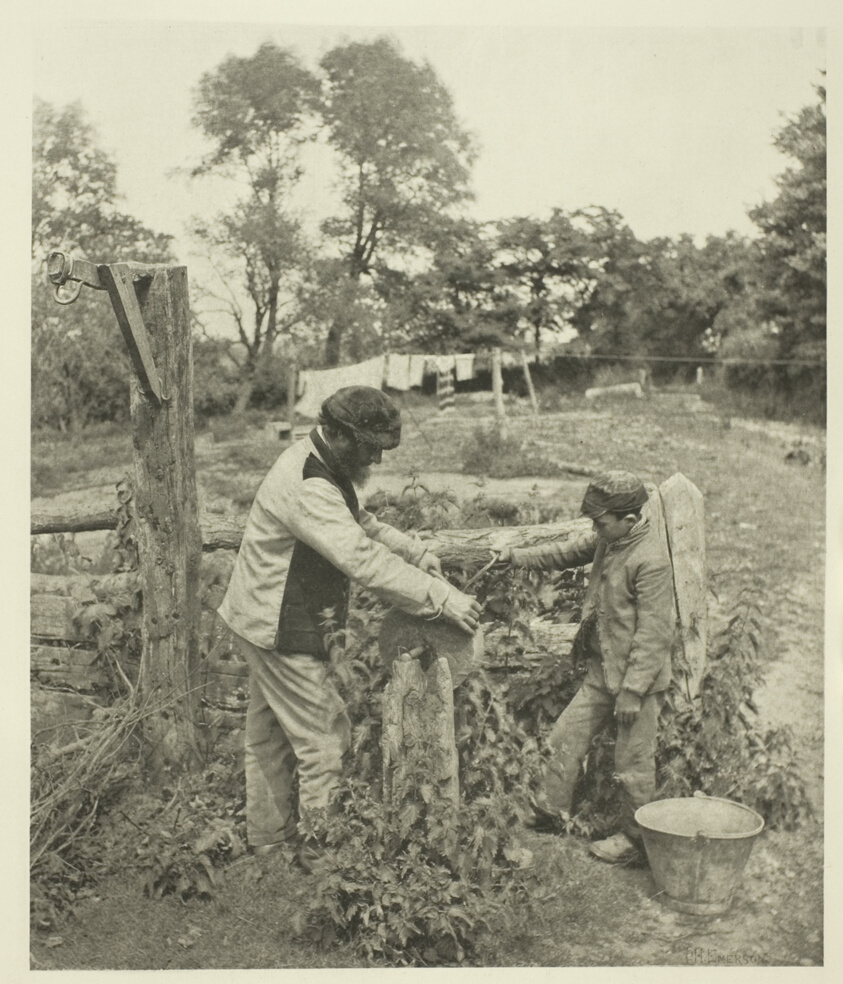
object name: Photograph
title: At the Grindstone-A Suffolk Farmyard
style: 19th century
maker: Peter Henry Emerson (English, born Cuba, 1856–1936)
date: c. 1883/87, printed 1888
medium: Photogravure, pl. XXX from the album "Pictures of East Anglian Life" (1888)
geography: England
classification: photogravure; photomechanical process; photography; photograph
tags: Collected by Hugh Edwards, Pictures of East Anglian Life, Seat of War in the Crimea